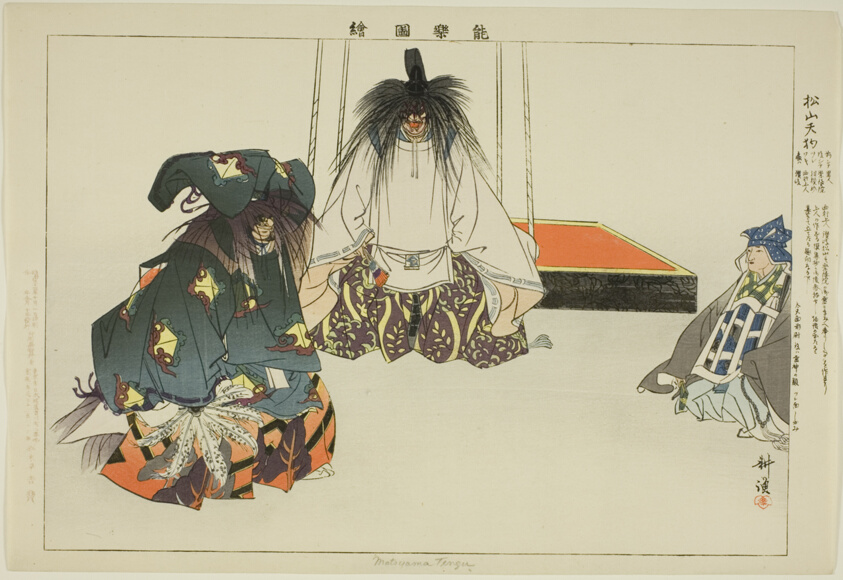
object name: Print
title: Matsuyama Tengu, from the series "Pictures of No Performances (Nogaku Zue)"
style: Japanese (culture or style)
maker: Tsukioka Kogyo; Japanese, 1869-1927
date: 1898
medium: Color woodblock print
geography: Japan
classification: woodblock print; print; asian art